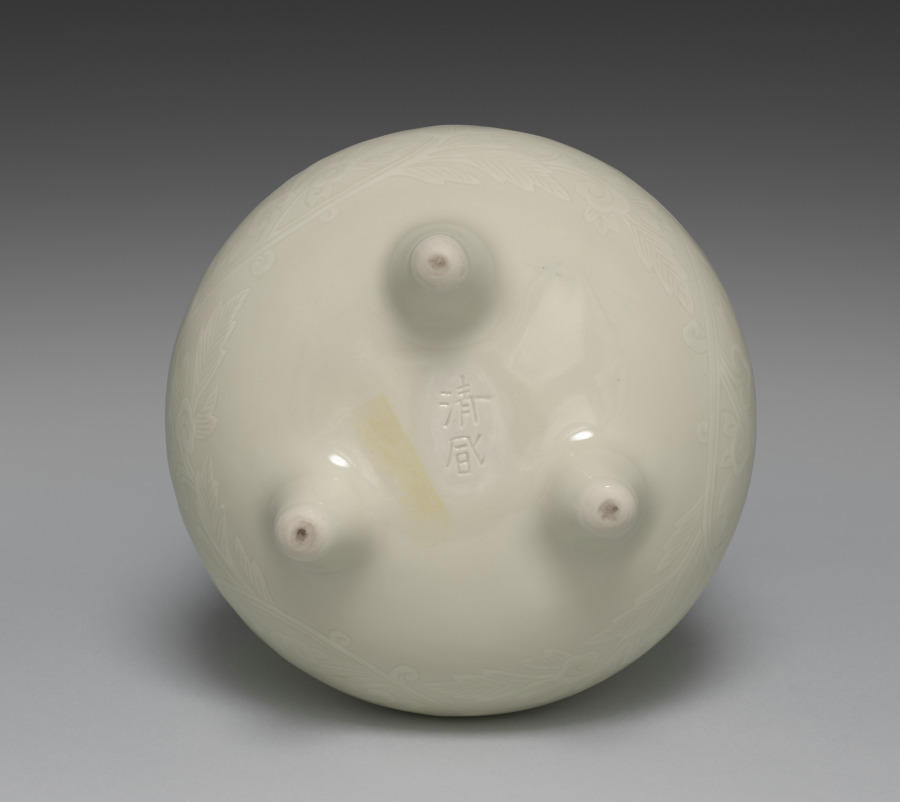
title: Incense Burner with Peony and Cloud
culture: Japan, Meiji period (1868–1912)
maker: Seifū Yohei III (Japanese, 1851–1914)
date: 1914–46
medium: Porcelain with molded and incised design, pale pink glaze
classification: Ceramic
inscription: 清風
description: Yohei IV’s incense burner has a scrolling floral pattern of peonies and nyoi staff-head forms around the body and a band of clouds around the collar. These are done in low relief, with incised lines marking the details in the flower petals and leaves. The silver lid has a proliferation of flowers, including lily, peony, and a variety of chrysanthemums. The box lid identifies the subtle pink over an ivory body as “dawn’s light[–glazed] porcelain” (shokōji). After he became an Artist of the Imperial Household, Yohei III created a number of glaze and clay combinations with what would have been considered Japan-focused names to be in alignment with his position as an artist representing the nation. Among them was a glaze called “dawn’s light pale [pink] color” (akebonoiro tansai), which he invented in 1895. It is possible that this incense burner is an example with this glaze, despite the slightly different name given on the box. While the name alludes to the Land of the Rising Sun, an epithet for Japan, the burner’s motifs remain very much drawn from the Chinese repertoire.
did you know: Seifū Yohei IV’s incense burner has a pale pink glaze named “dawn’s light.”